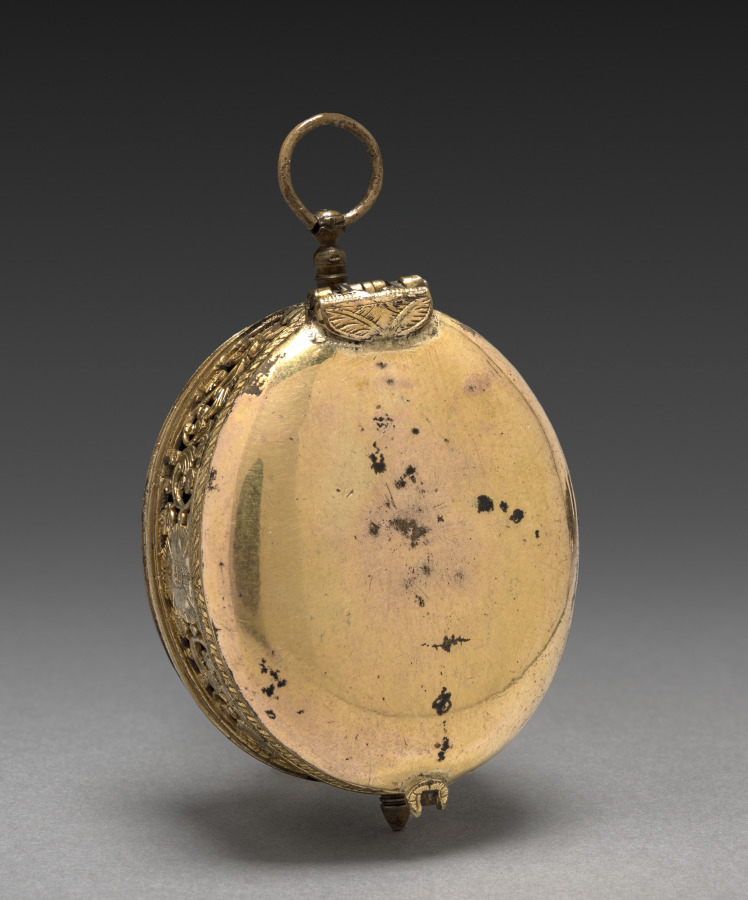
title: Watch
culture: Germany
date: 1600s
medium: gilded metal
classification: Jewelry